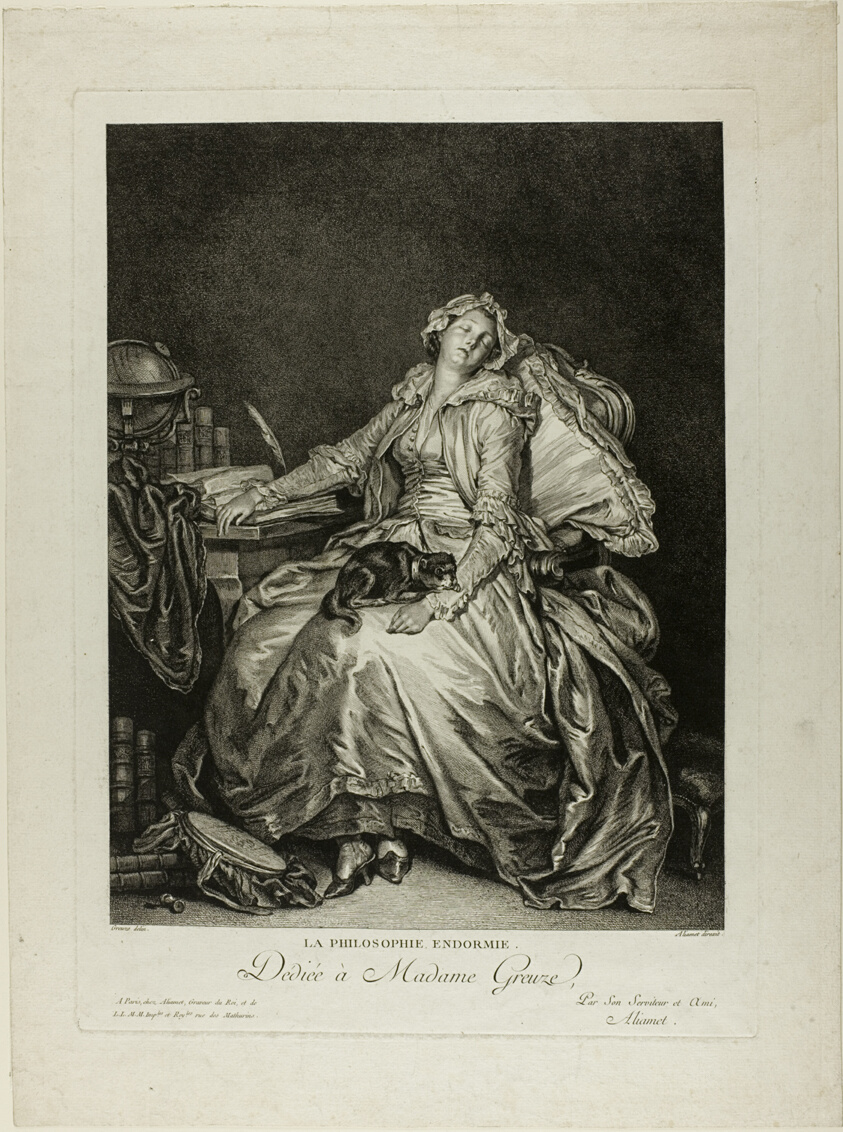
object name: Print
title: Philosophy Asleep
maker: Jacques Aliamet (French, 1726-1788); after Jean-Baptiste Greuze (French, 1725-1805)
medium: Engraving on paper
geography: France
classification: engraving; print; prints and drawing